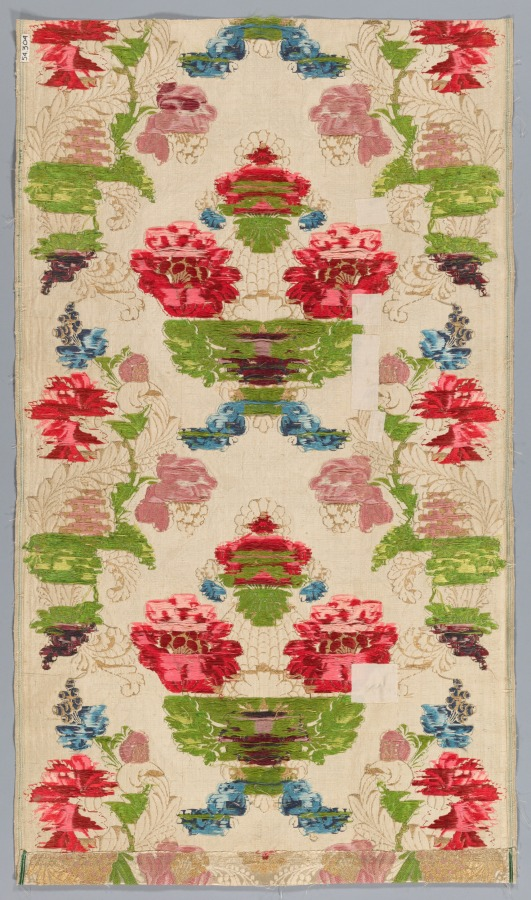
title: Length of Textile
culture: France or Italy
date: early 1700s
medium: brocade on satin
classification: Textile